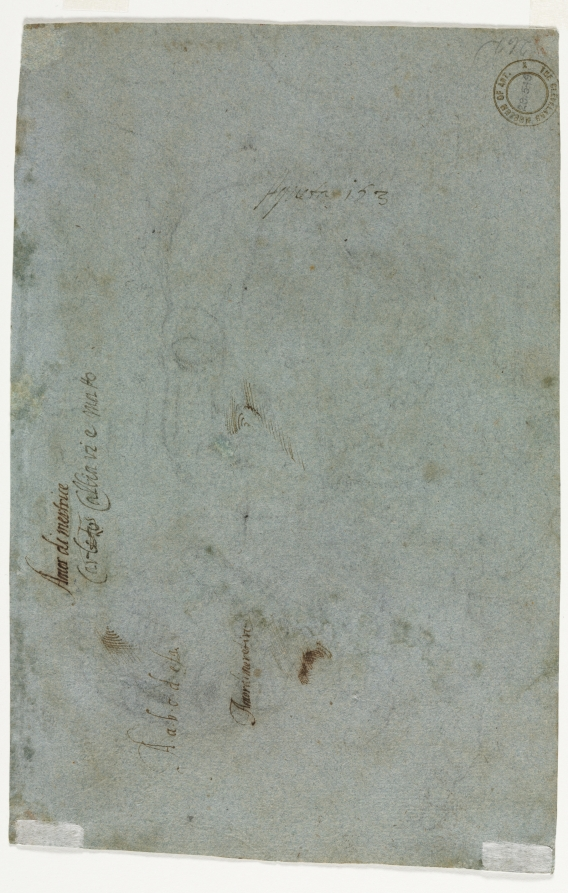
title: Sketch of a Child's Head (verso)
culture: Italy, 16th century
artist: Carletto Caliari (Italian, 1570–1596)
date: c. 1586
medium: black chalk with pen and brown ink (unrelated to child's head)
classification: Drawing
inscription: upper right, in graphite: 262 [upside down] ; upper center, in brown ink: Aqueta i53 ; center left, in brown ink: Amor di mertrice [sideways] ; center left, in brown ink: Carleto [partially crossed out] Callia ri e ma[tt?]o [sideways] ; lower left, in brown ink: A.a.b.c.d.efg [sideways] ; lower center, in brown ink: Amordimeret[illegible] [sideways]